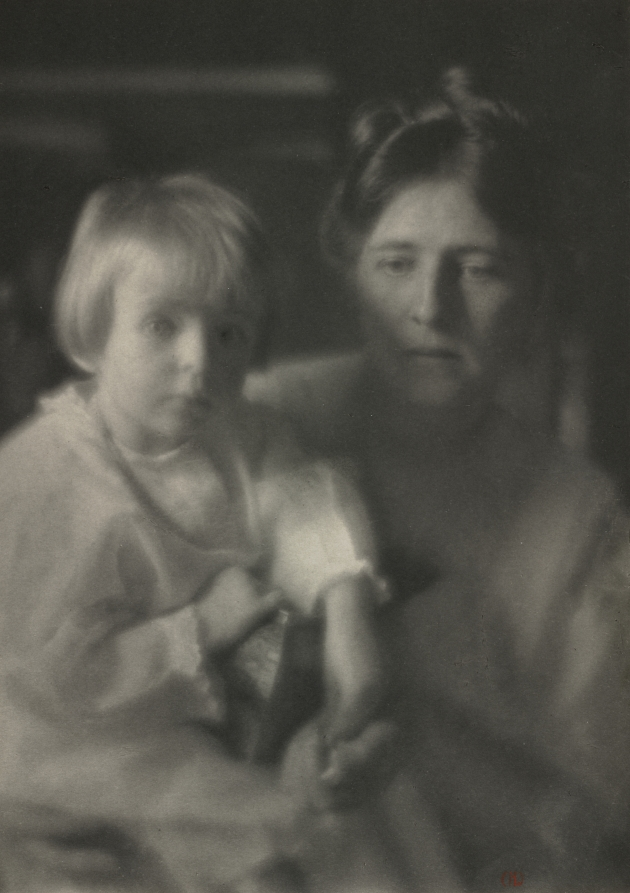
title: Julia McCune Flory and Elizabeth Flory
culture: America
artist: Clarence H. White (American, 1871–1925)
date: 1915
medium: platinum print with pencil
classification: Photograph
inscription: Written in red ink on recto of photo: "CHW"; in pencil on recto of original mount: "Clarence H. White [signed] '15"